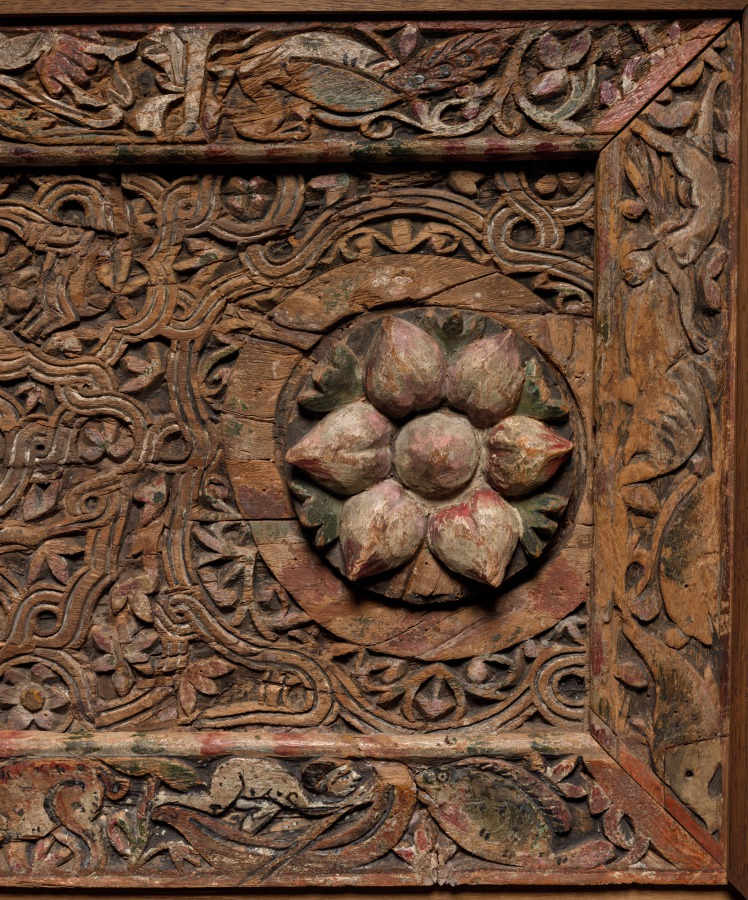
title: Ornamental Panel (from a Ceiling?)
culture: Egypt, Coptic period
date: 500s (frame) and 700s (central panel)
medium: wood with paint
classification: Furniture and woodwork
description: This wooden panel and its frame come from different locations. The four narrow panels forming the outer frame are stylistically datable to the 500s. The large central rectangular panel might date to the 700s. It is most likely a carved ceiling, but its architectural context is unknown. Both panel and frame have been cut down and joined together at some point in their history under unknown circumstances. The decorative program of the main panel features two large rosettes surrounded by florets, leaves, and fruit. The outer frame features two flying angels holding a wreath, a peacock, an octopus, a seated fisherman who holds a long line with a fish attached, and a swimming boy with a dolphin. The vocabulary of the frame is dominated by water life, particularly of the Nile and its banks. Though separated from its original place and altered, this important object provides a welcome glimpse of an architectural interior from early Christian Egypt.